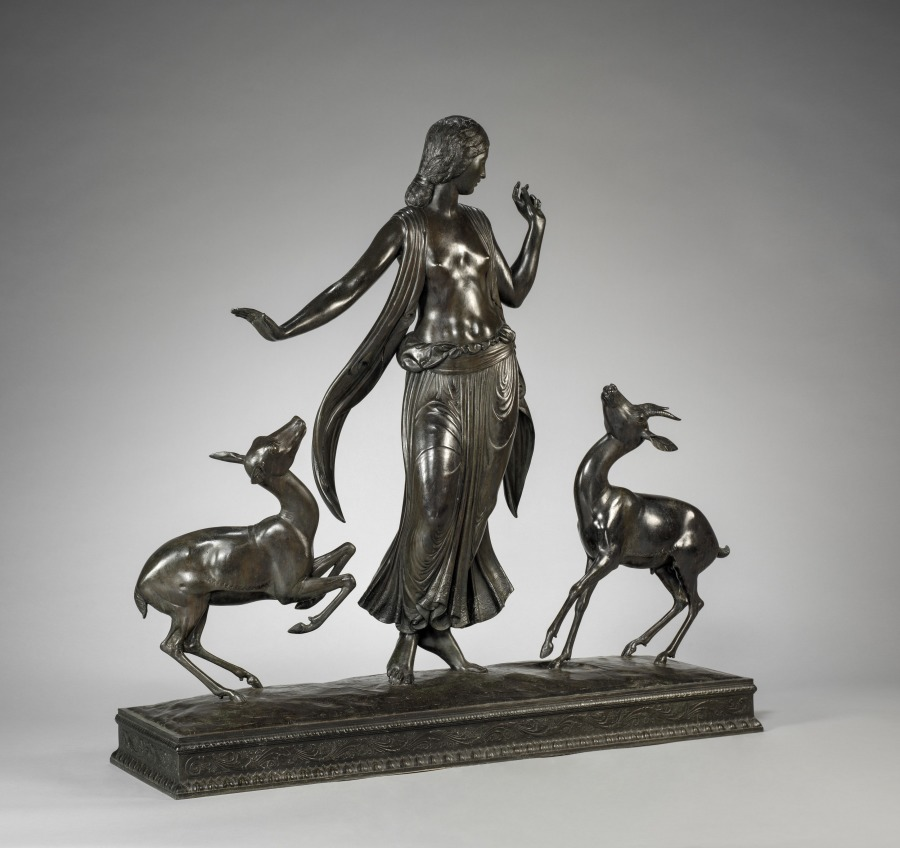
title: Dancer and Gazelles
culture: America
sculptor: Paul Manship (American, 1885–1966)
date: 1916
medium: bronze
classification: Sculpture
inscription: Signed on base: PAUL MANSHIP © 1916.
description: One of Manship’s most popular compositions, this work established his reputation as an important up-and-coming sculptor. Here, his mastery of elegant silhouette is manifest through the gracefully posed dancer and her sleek animal companions. Stylized decorative patterning embellishes the dancer’s hair and swaying skirt.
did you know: Initially interested in painting, Manship opted to pursue sculpture after discovering he had color vision deficiency.